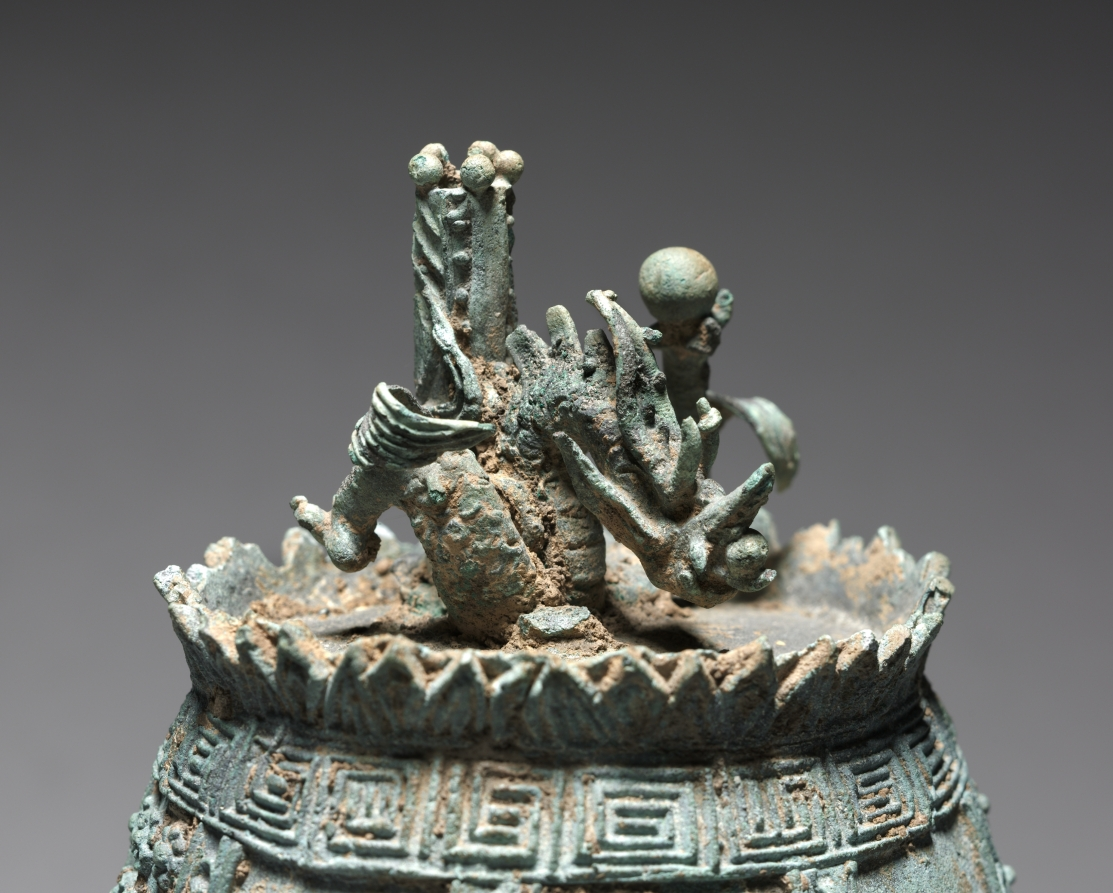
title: Bronze Ritual Bell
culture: Korea, Goryeo dynasty (918–1392)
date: 1226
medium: cast bronze with incised inscription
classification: Metalwork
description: This miniature bell was once used as part of Buddhist indoor rituals. Likely suspended in a Buddhist temple, it features a cast dragon and a vertical tube to amplify the sound on top, and is decorated with Buddhist figures seated on lotuses. The echoing sound of the bell was thought to help Buddhist believers understand the significance of transience and impermanence; the sound instantly fades away as soon as one hears it. This sensory experience creates a striking conceptual parallel with Buddhist teachings, including the idea that all things and beings exist merely in our perception or imagination. An inscription indicates it was cast in the year of the dragon and took three years to make.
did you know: The inscription informs us that this miniature indoor bell was produced in 1226.